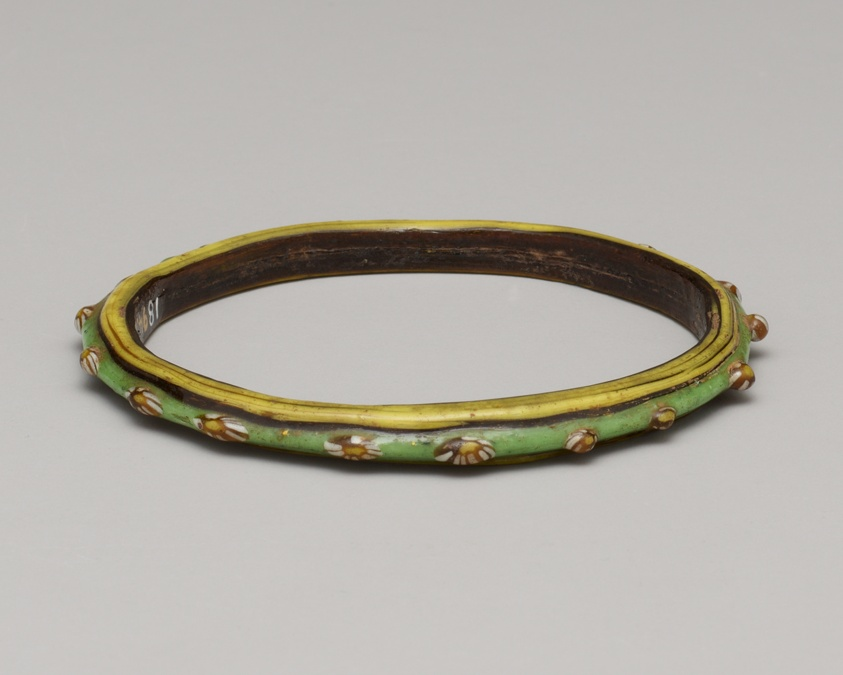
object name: Costume and Accessories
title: Bracelet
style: greco-roman (egyptian)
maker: Islamic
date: 14th-15th century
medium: Glass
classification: glass; jewelry; ancient art; costume